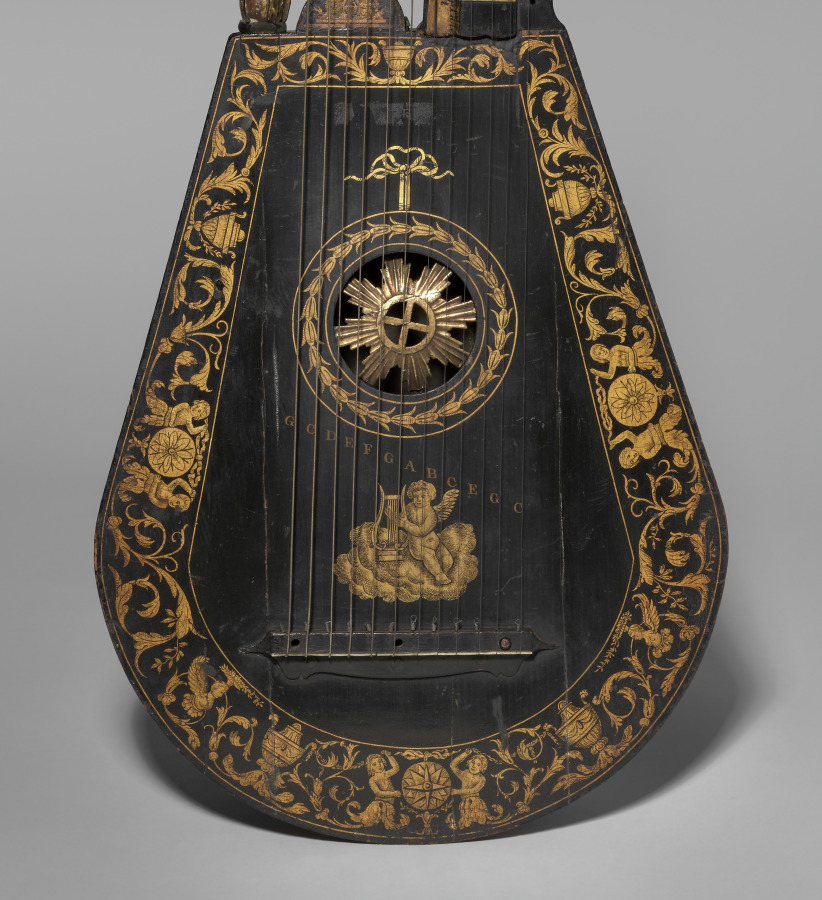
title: Harp-Lute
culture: England, London, 18th century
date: 1700s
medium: varnished wood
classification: Musical Instrument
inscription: the maker's name is illegible, but the number of the instrument is 14.